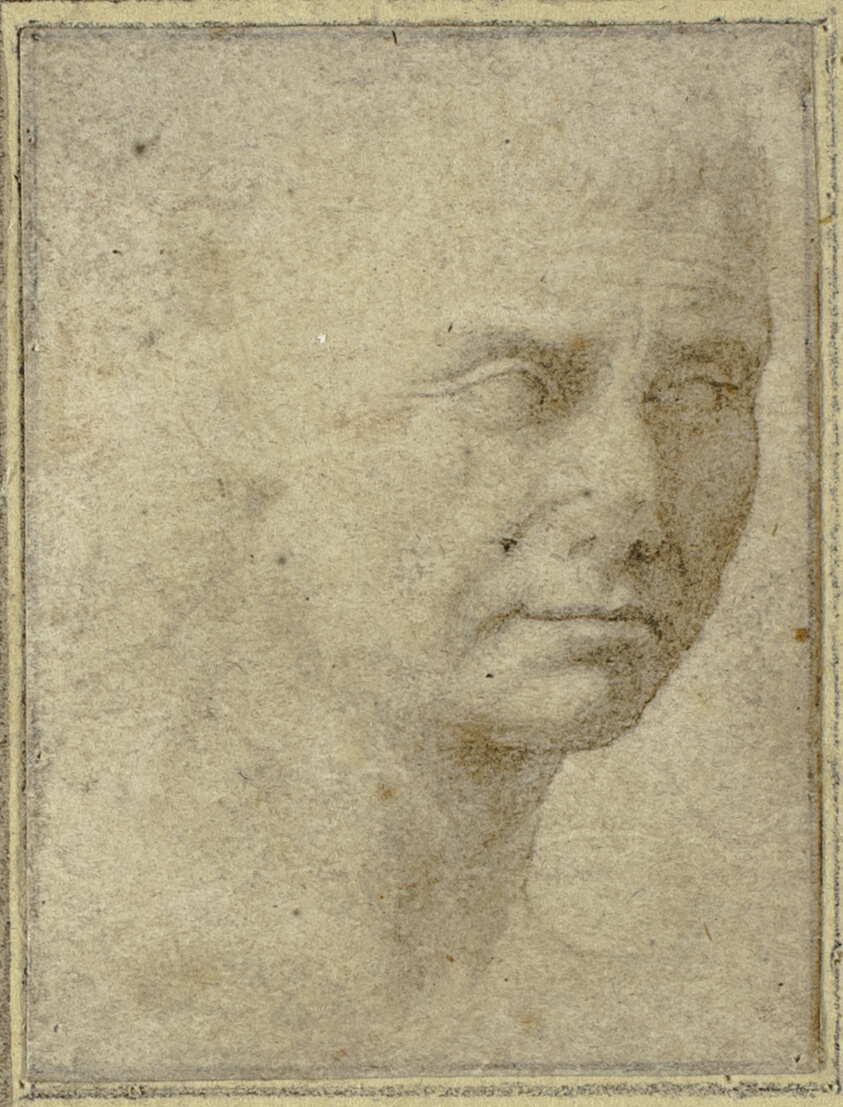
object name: Drawing and Watercolor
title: Head of a Man in Three-quarters Profile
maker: Unknown Artist; Italian, early 16th century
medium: Brush and brown wash and black chalk, on buff laid paper, laid down on card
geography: Italy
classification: chalk and wash; drawings (visual works); prints and drawing